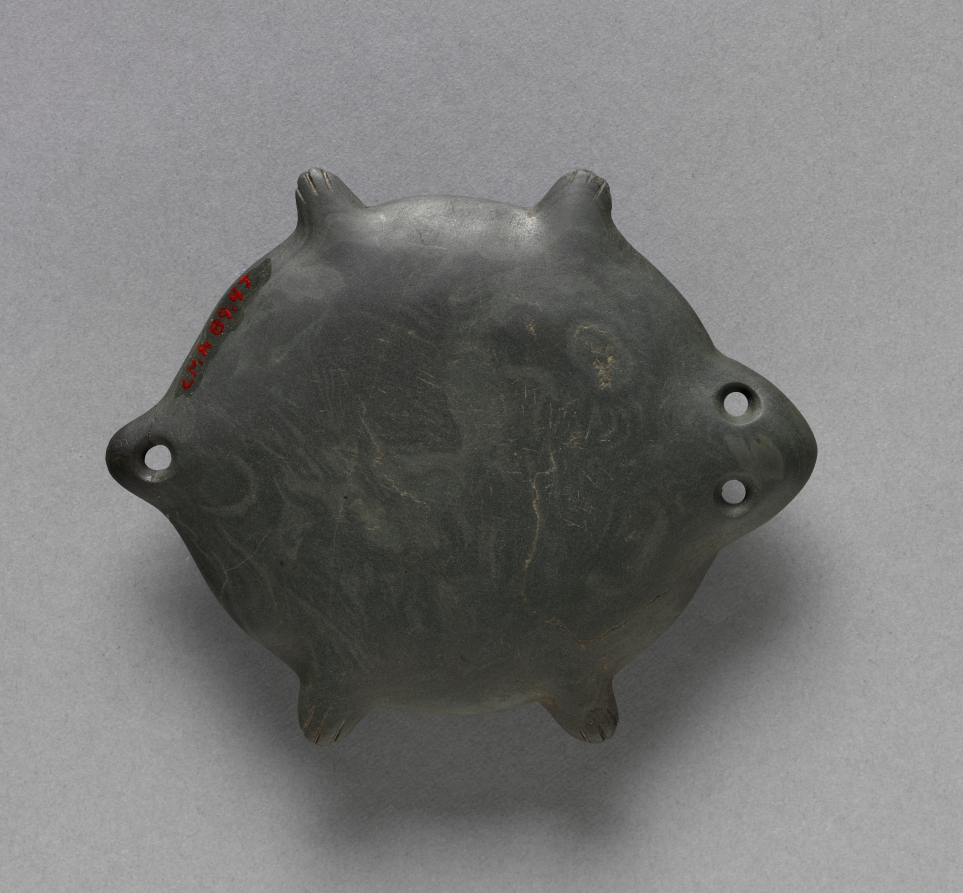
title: Palette in the Form of a Turtle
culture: Egypt, Predynastic (5000–2950 BCE), Naqada IIa–IIIa (3650–3000 BCE)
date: c. 3500–3050 BCE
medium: graywacke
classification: Implements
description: Stone palettes were used for grinding eyepaint worn by men and women alike for cosmetic purposes and to protect against sun glare and eye infections. There were two types of eyepaint: green, made from malachite (copper ore), and black, made from galena (lead ore). Small quantities of ore are sometimes found in graves alongside the palettes.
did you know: This is an ancient makeup palette used to blend and apply cosmetics.